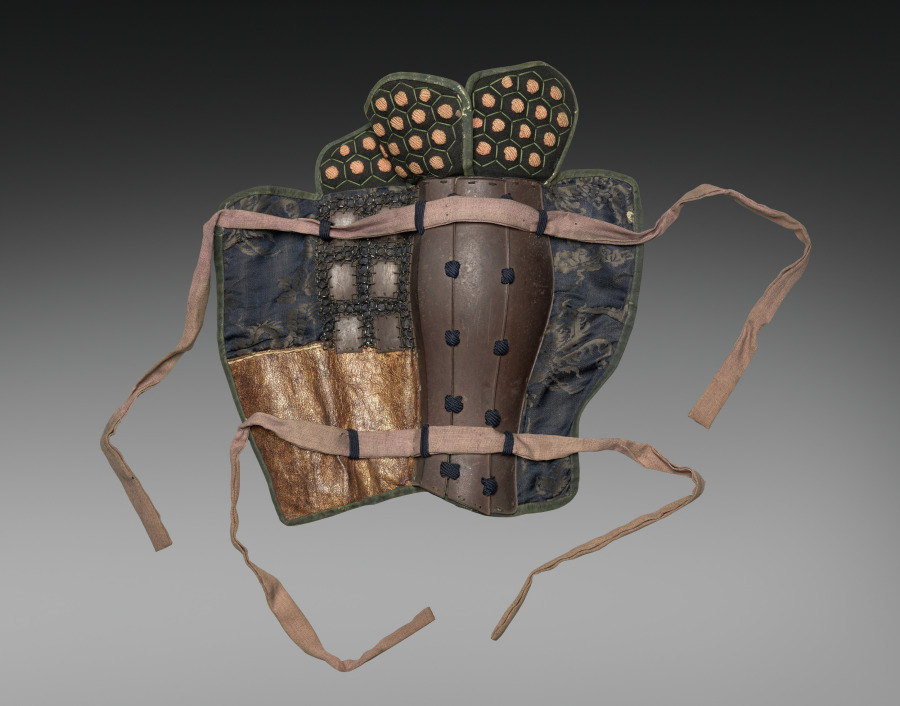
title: Shin Guard (Sune-ate)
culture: Japan, Edo period (1615–1868)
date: 1600s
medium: Iron, lacquer, textile (silk)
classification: Arms and Armor